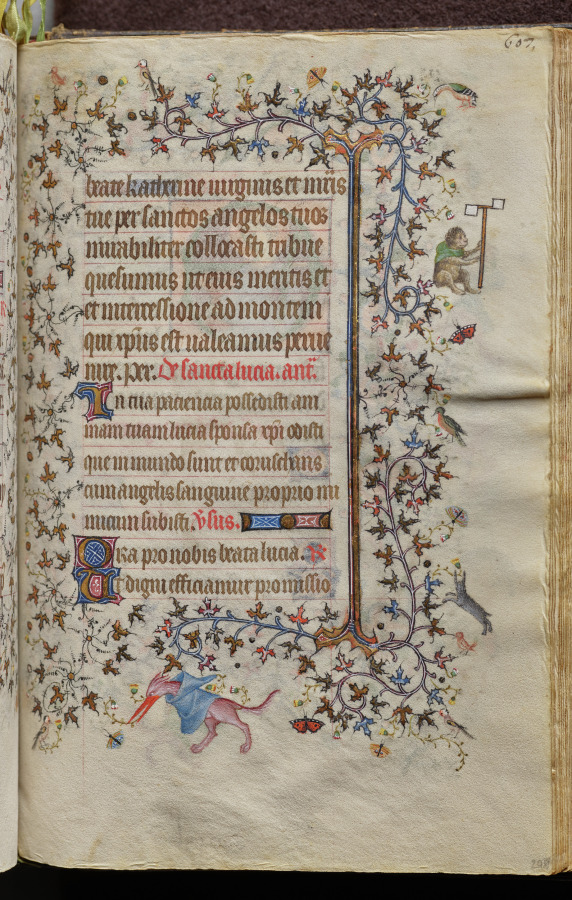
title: Hours of Charles the Noble, King of Navarre (1361-1425): fol. 298rv, Text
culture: France, Paris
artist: Master of the Brussels Initials and Associates (French)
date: c. 1405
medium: ink, tempera, and gold on vellum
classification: Bound Volume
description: This precious volume was obviously highly prized by its owner, the French-born King of Navarre, who had his coat of arms painted on no less than twenty folios. Rather than directly commissioning this manuscript from a specific workshop, it seems that Charles the Noble acquired his book of hours -- perhaps ready-made for the luxury market -- while on a trip to Paris in 1404-05. A collaborative effort, six painting styles are evidenced within the pages of this codex, those of two Italians, two Frenchmen, and two Netherlanders. The painter who was responsible for the planning and decoration of the book, and who produced seventeen of the large miniatures, was a Bolognese artist known as the Master of the Brussels Initials. His principal assistant, responsible for most of the borders, was a Florentine who signed his name "Zecho" da Firenze on folio 208 verso.